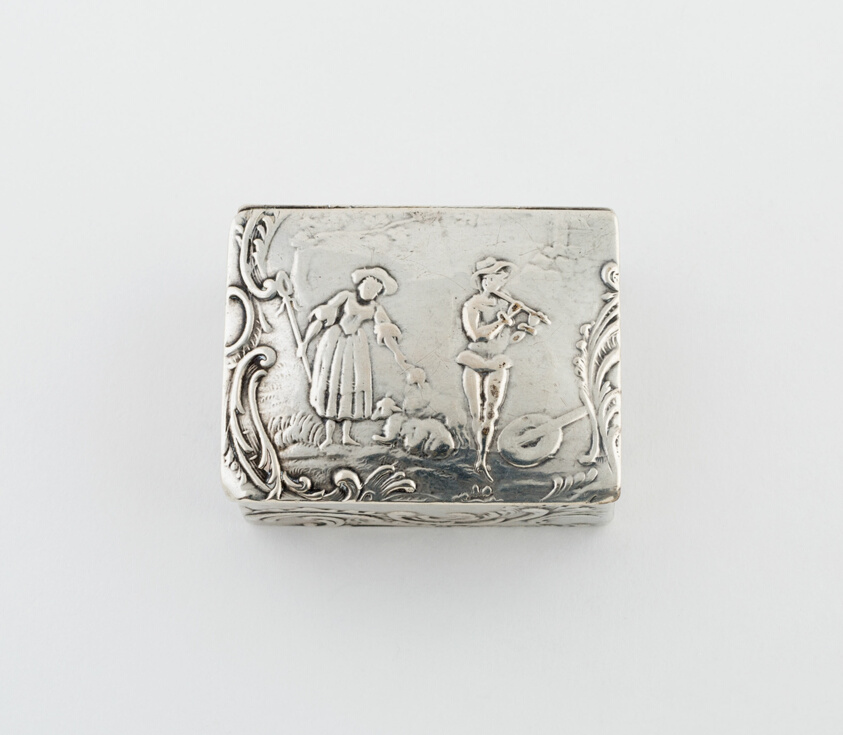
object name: Metalwork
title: Snuffbox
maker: Continental Europe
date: c. 1870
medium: Silver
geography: Europe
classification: snuff box; container for personal use; box; european decorative arts; metalwork; silver; decorative object/ornament